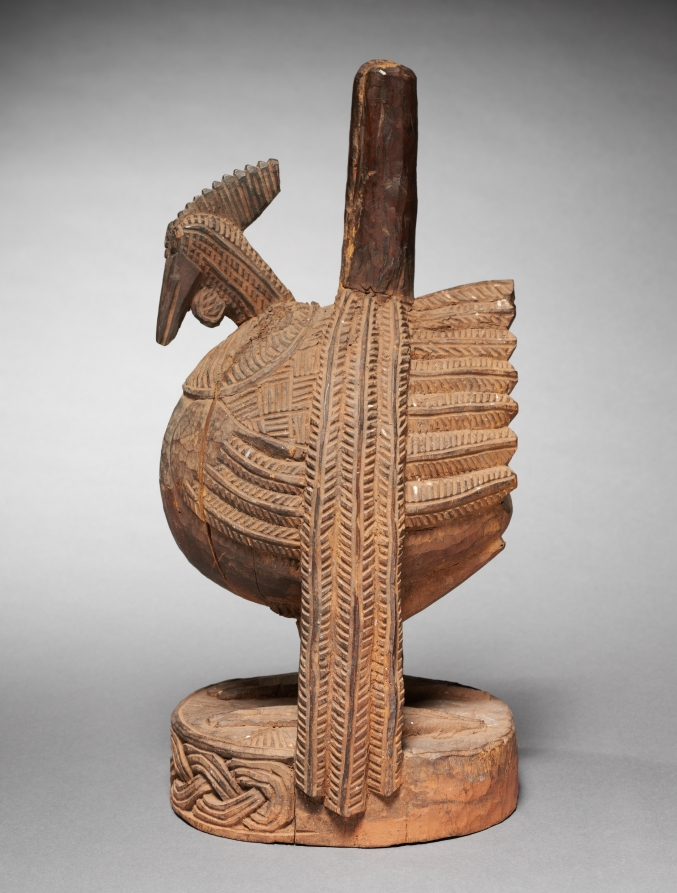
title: Hen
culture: Nigeria, Benin Kingdom, Ẹdo peoples, member(s) of the Igbesanmwan (wood and ivory carvers) guild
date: 1900s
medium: wood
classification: Sculpture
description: Materials used for ritual objects correspond with the status of their owner, or the person it was dedicated to. Men have cast brass roosters, while women have carved wooden hens like this. This egg-shaped bird is covered with patterns formed by parallel lines indicating the bird’s feathers, from fluffy tufts to sleek plumage. Realistically carved, it replicates an animal that would be sacrificed on a woman’s shrine. On an ancestral altar, it sat alongside other objects like rattle staffs. While Benin is patriarchal (men and their male sons lead), women are important; men cannot succeed spiritually or politically without them.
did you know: The interlacing pattern on the base of this sculpture can be seen in Benin Kingdom works in materials from wood to ivory to metal.